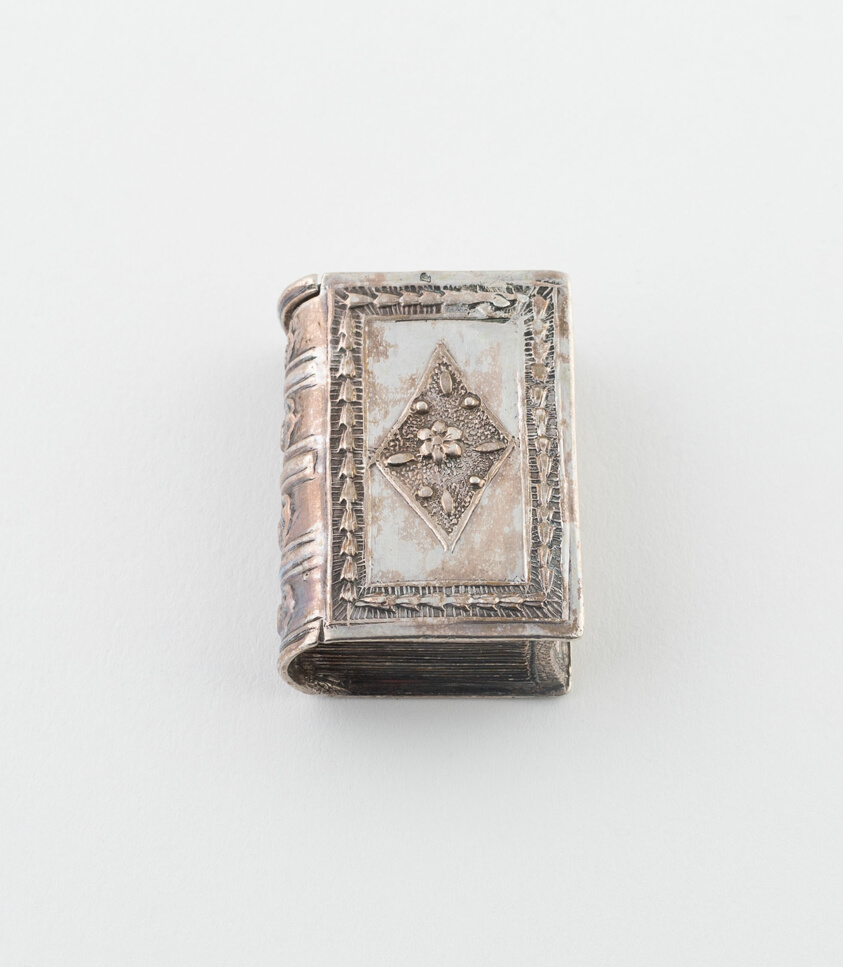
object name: Metalwork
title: Book-Shaped Match Safe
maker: Possibly Netherlands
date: c. 1880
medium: Silver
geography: Netherlands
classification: container for personal use; box; european decorative arts; metalwork; silver; decorative object/ornament